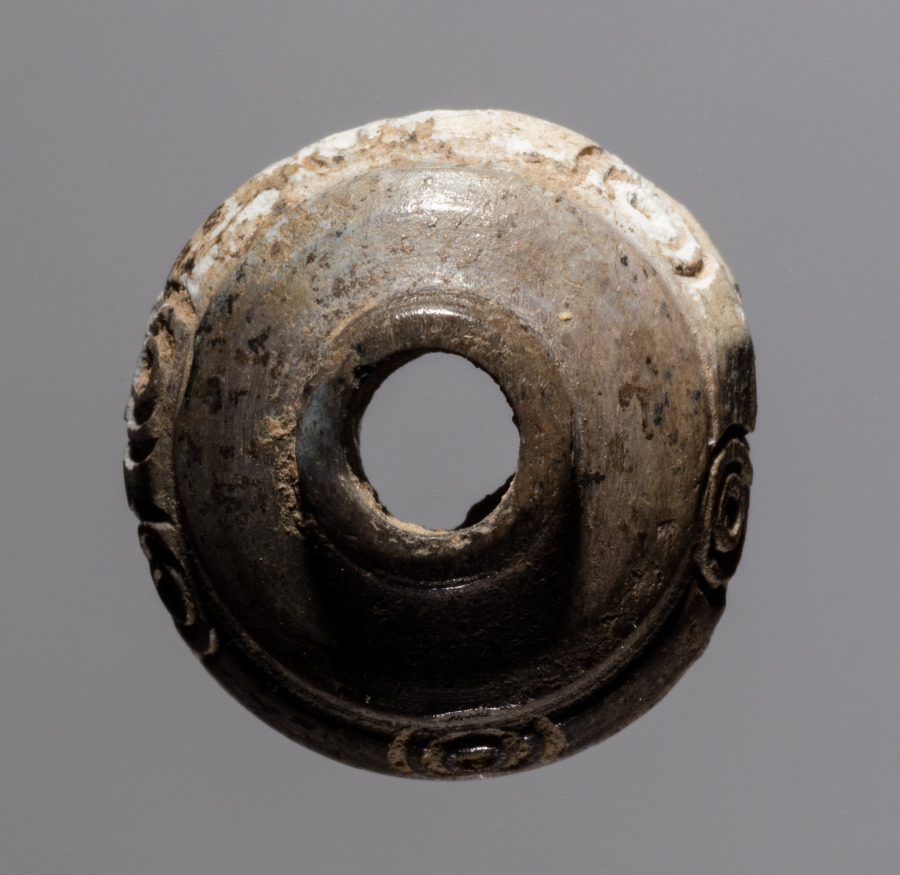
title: Spindle Whorl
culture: Iran, early Islamic period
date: 700s - 900s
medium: bone, incised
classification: Spindle Whorl